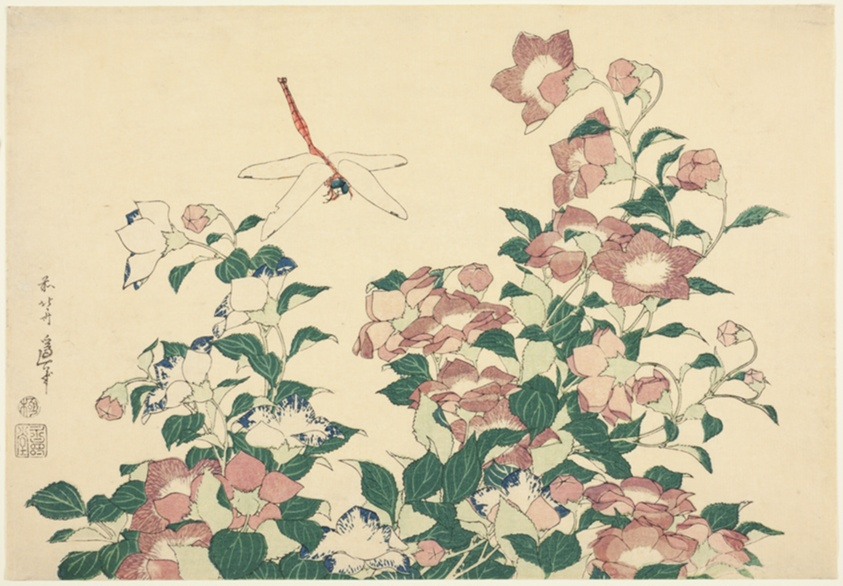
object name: Print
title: Bell-Flower and Dragonfly, from an untitled series of large flowers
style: Japanese (culture or style)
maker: Katsushika Hokusai 葛飾 北斎; Japanese, 1760-1849; Publisher: Hibino Yohachi; Japanese, unknown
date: c. 1833/34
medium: Color woodblock print; oban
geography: Japan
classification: woodblock print; print; asian art